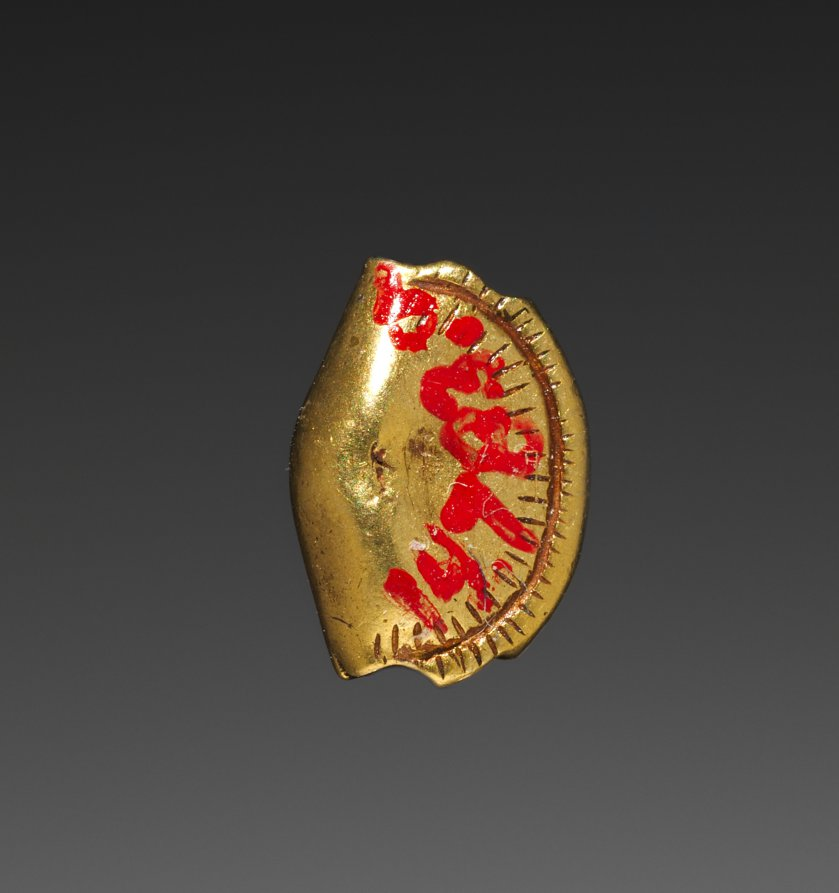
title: Wallet Bead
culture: Egypt, New Kingdom (1540–1069 BCE), Dynasty 18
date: 1540–1296 BCE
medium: gold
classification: Jewelry